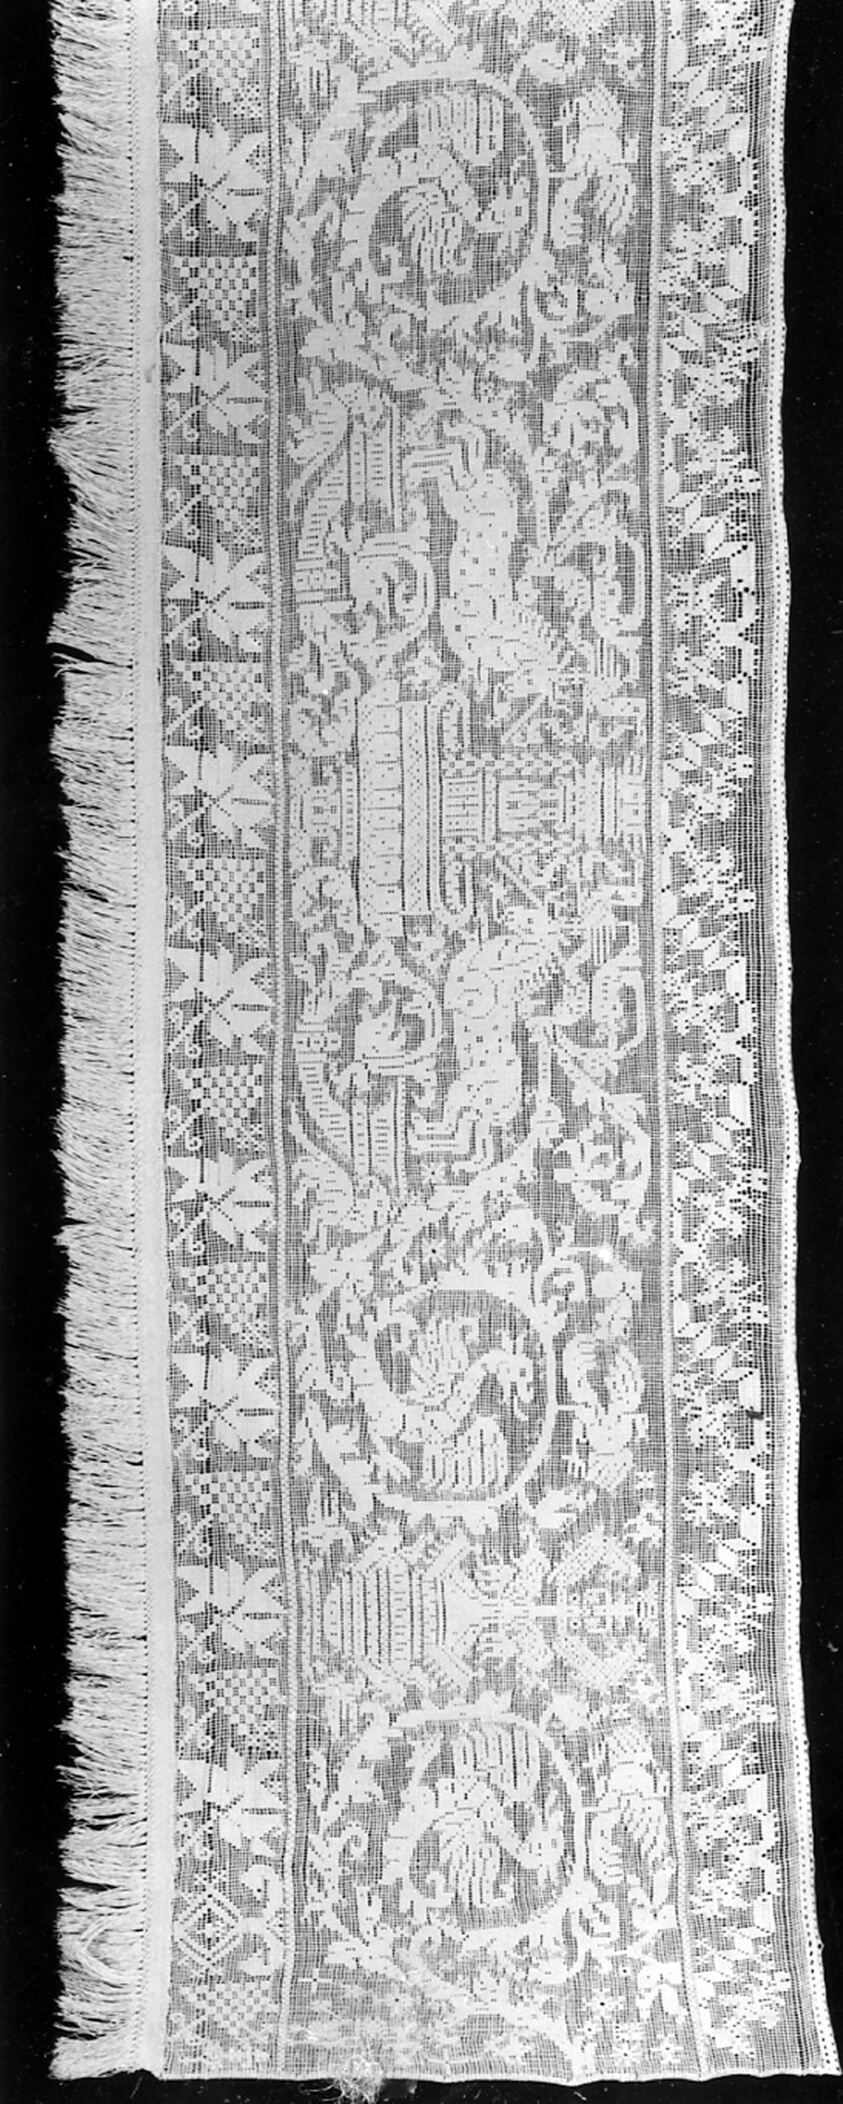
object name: Textile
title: Border for Altar Cloth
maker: Italy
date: 17th century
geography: Italy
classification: textile; needlework (visual works); altar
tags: altar